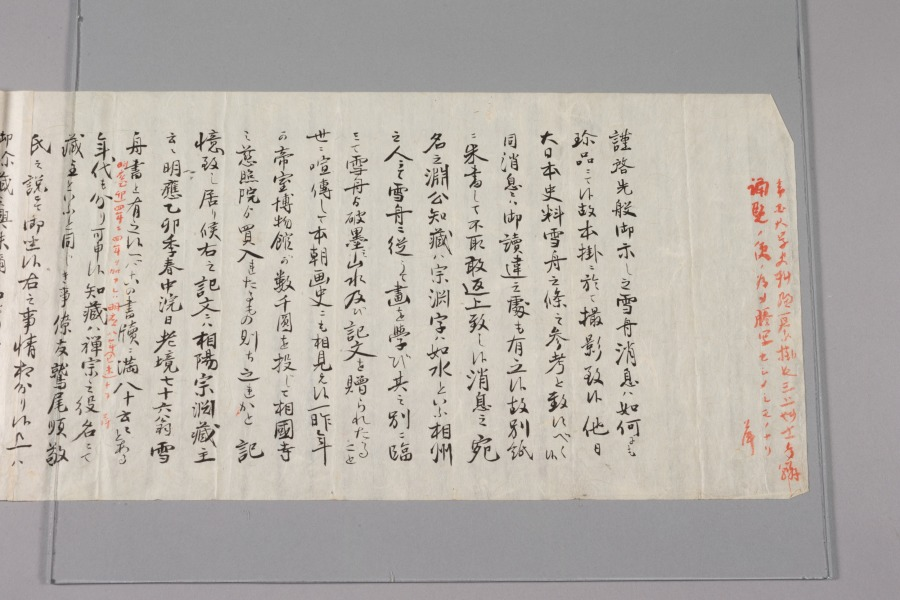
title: Fujiwara no Muchimaro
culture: Japan, Kamakura period (1185–1333)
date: 1200s or 1300s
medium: Hanging scroll; ink, color, gold, and cut gold on silk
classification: Painting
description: This portrait of Fujiwara no Muchimaro (680–737), a grandson of Fujiwara no Kamatari (614–669), includes an image of Buddha Dainichi Nyorai above his head. By situating the image of Dainichi there, this painting would seem to assert that Muchimaro is an avatar of Dainichi. In the same way that kami could be identified with Buddhist counterparts, powerful humans could also be seen as manifestations of Buddhist deities. A similar painting is at Eizanji in Nara, of which Muchimaro is known as the founder. It was once a branch temple of Kōfukuji, the Fujiwara family temple.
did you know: The boughs of wisteria appearing in the background symbolize the figure's status as a Fujiwara family member.